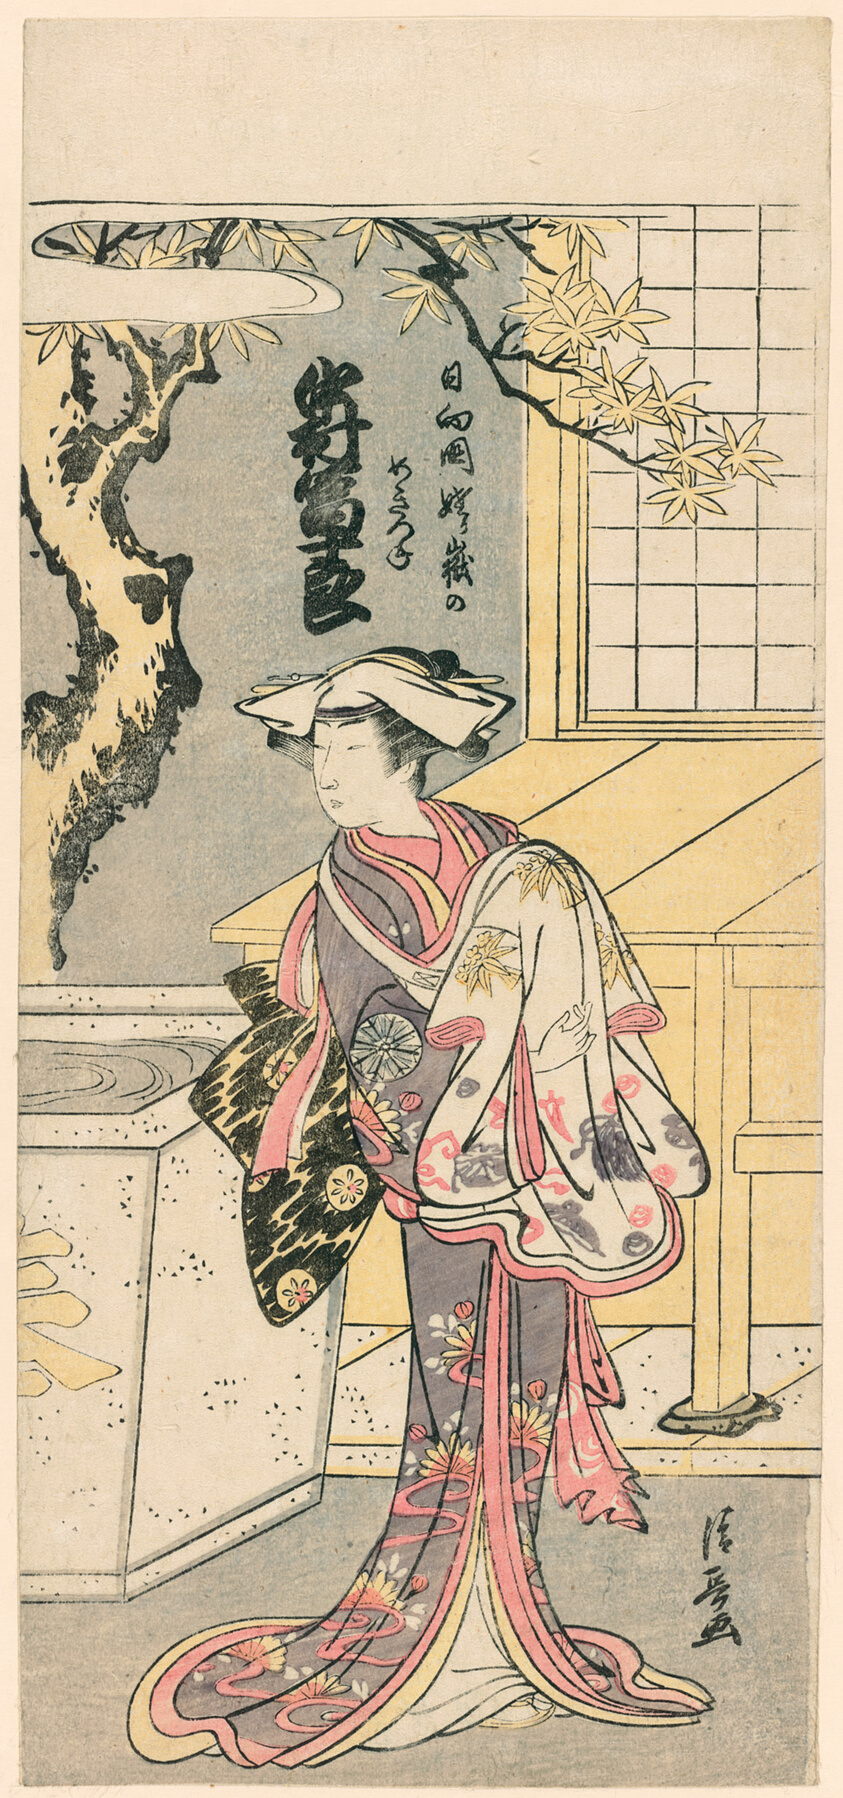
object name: Print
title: Nakamura Tomijuro I as a Female Fox in the Scene from the Play, Chigo Torii Tobiiri Gitsune (Nakamura Tomijuro no Hyuga no kuni Ubagatake no megitsune)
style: Japanese (culture or style)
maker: Torii Kiyonaga (Japanese, 1752-1815)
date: 1777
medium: Color woodblock print; hosoban, benizuri-e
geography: Japan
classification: woodblock print; print; asian art